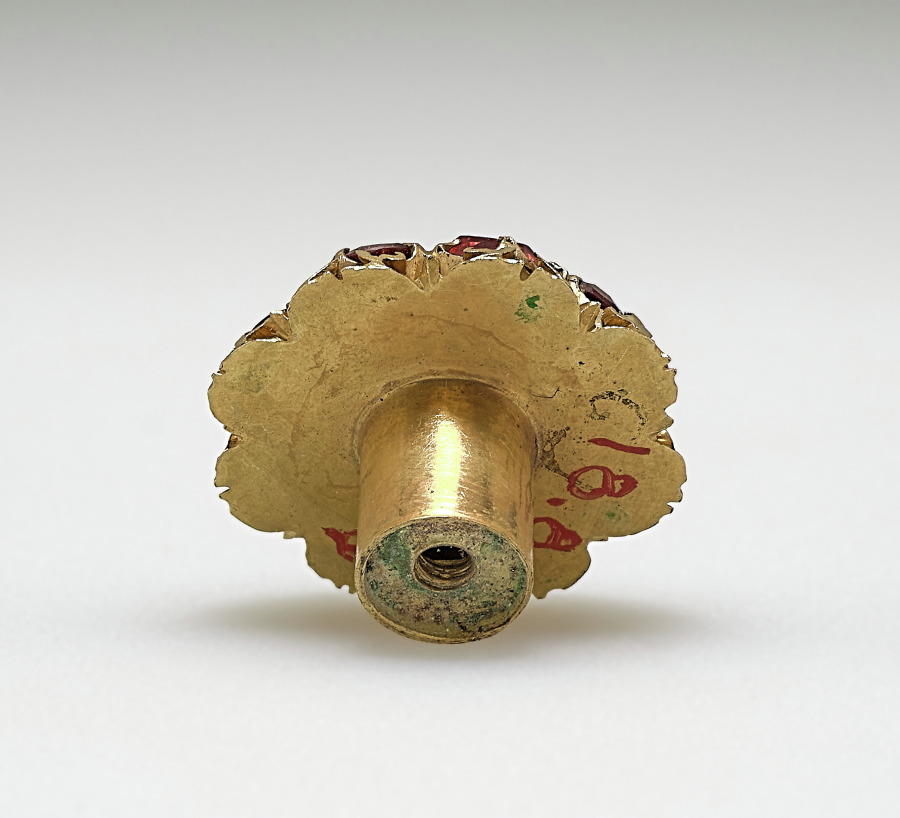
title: Earring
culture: Burma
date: 1800s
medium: gold and rubies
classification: Jewelry